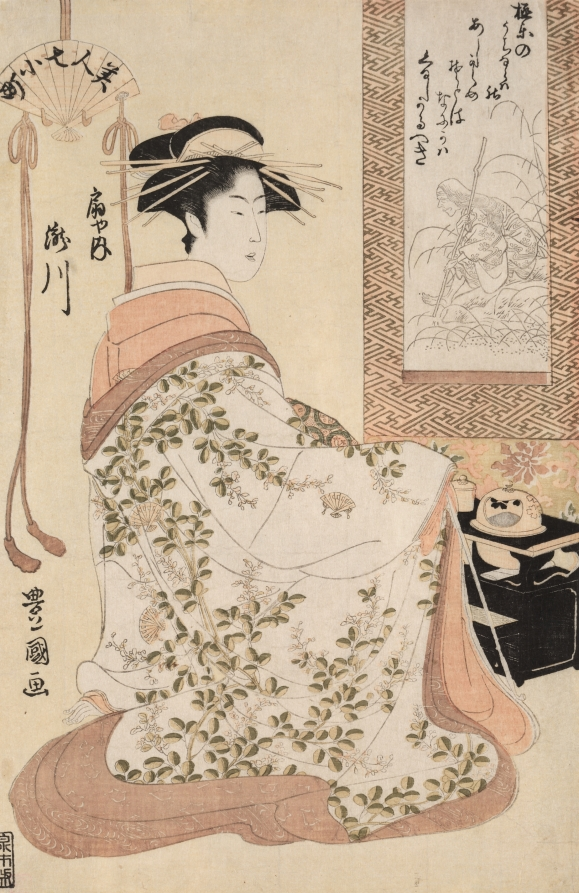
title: Takigawa of Ōgiya, from the series Beauties as the Seven Komachi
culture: Japan, Edo period (1615–1868)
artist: Utagawa Toyokuni (Japanese, 1769–1825)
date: c. 1793–97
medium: Color woodblock print; ink and color on paper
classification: Print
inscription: Artist's signature: Toyokuni ga.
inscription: Publisher: Izumiya Ichibei (Senichi han). Censorship Seal: kiwame.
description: Seven plays based on legends from the life of 9th-century poet Ono no Komachi served as the source for this print series. The entertainer Takigawa gazes at a hanging scroll depicting Komachi as she appears in a scene from the play The Gravestone.